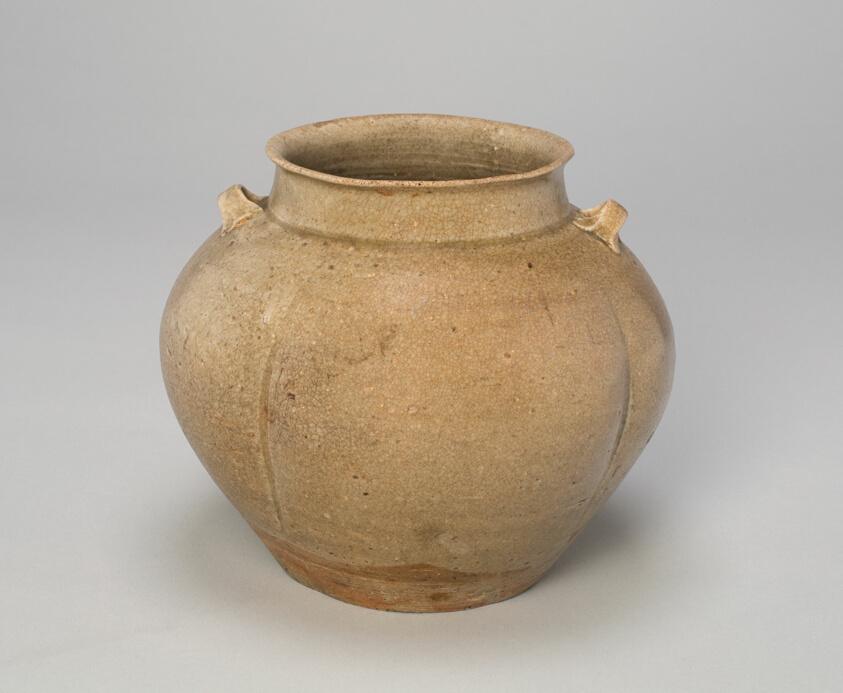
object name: Vessel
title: Jar with Loop-Handles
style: Chinese (culture or style)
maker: China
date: Tang (618–907) or Song dynasty (960–1279), c. 9th/10th century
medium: Yue ware; celadon-glazed stoneware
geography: China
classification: stoneware; asian art; ceramics; vessel